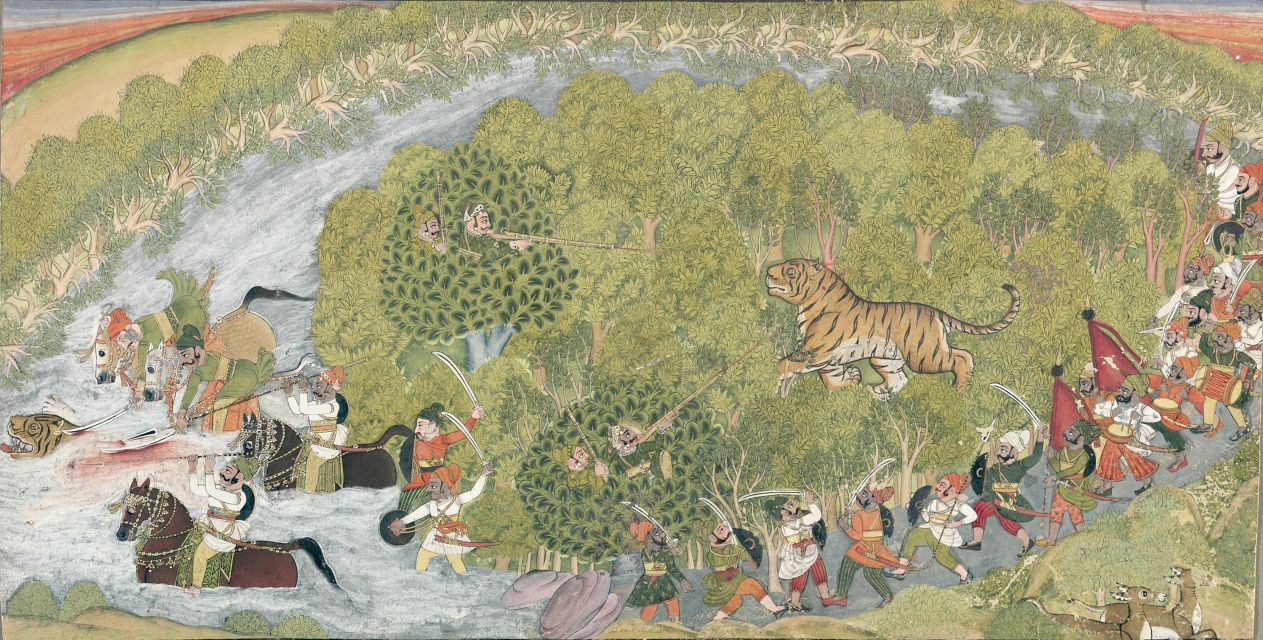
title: Tiger Hunt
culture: India, Kotah School, Raja Umed Singh period (1771-1820)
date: c. 1800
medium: Gum tempera, ink, and gold on paper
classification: Painting